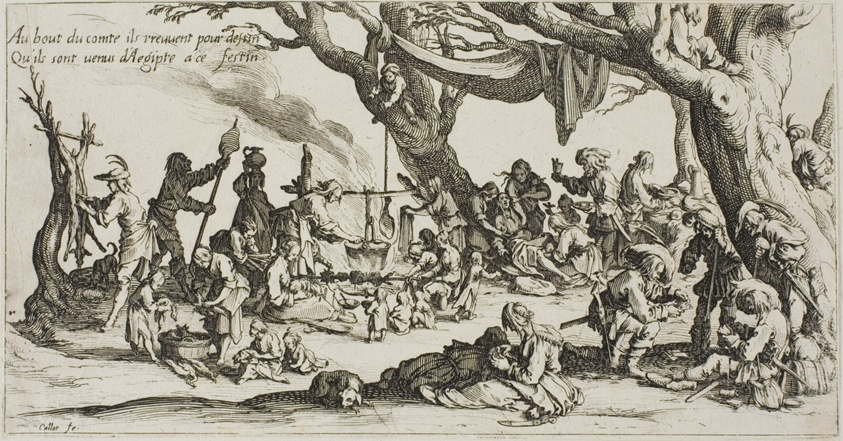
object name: Print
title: Camping Place of the Gypsies: The Preparation of the Feast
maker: Jacques Callot (French, 1592-1635)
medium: Etching with burin on paper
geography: France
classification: etching; print; prints and drawing